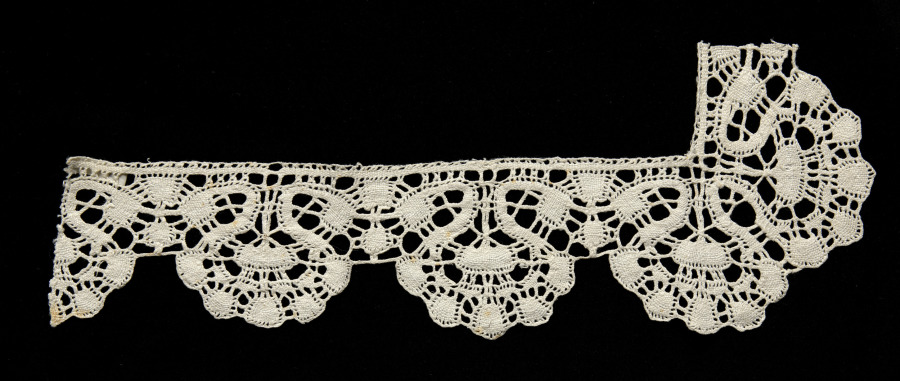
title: Lace Edging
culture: Italy, Abruzzi, Pescocostanzo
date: 1700s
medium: Bobbin lace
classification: Lace